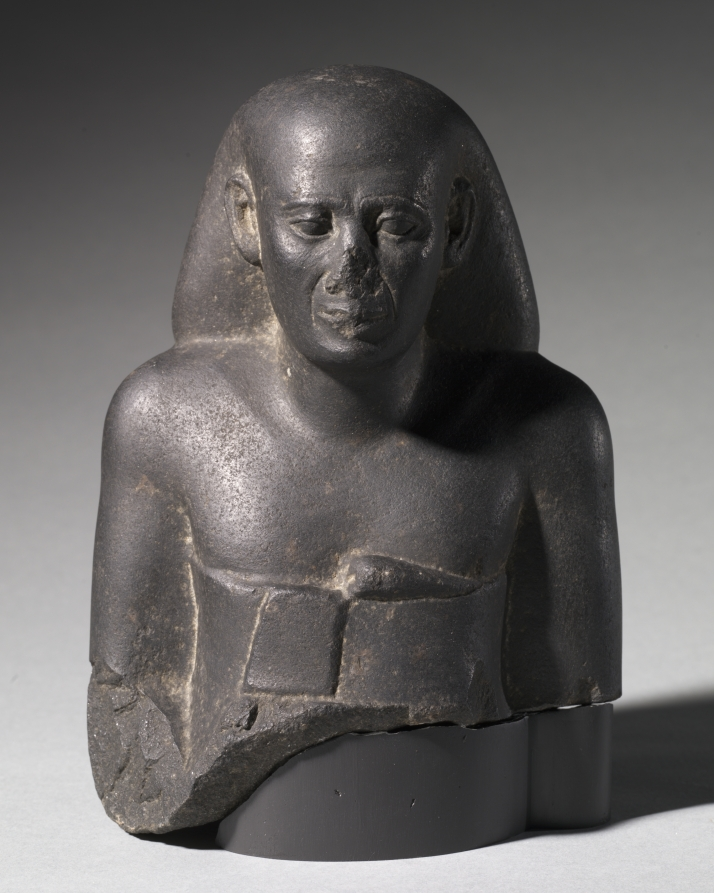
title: Bust of Ankh-Hor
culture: Egypt, Late period (715–332 BCE), Dynasty 27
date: 525–404 BCE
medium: basalt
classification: Sculpture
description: This bust of Ankh-Hor comprises the top portion of a temple statue. From the position of the arms, it is evident that it originally belonged to a striding figure holding a naos, or shrine, containing the image of a deity. His high-waisted wraparound robe, fashionable during the Persian period (Dynasty 27) when this figure was carved, would have reached to his ankles.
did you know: The black volcanic basalt stone imparts a sleek appearance to this revered temple statue.